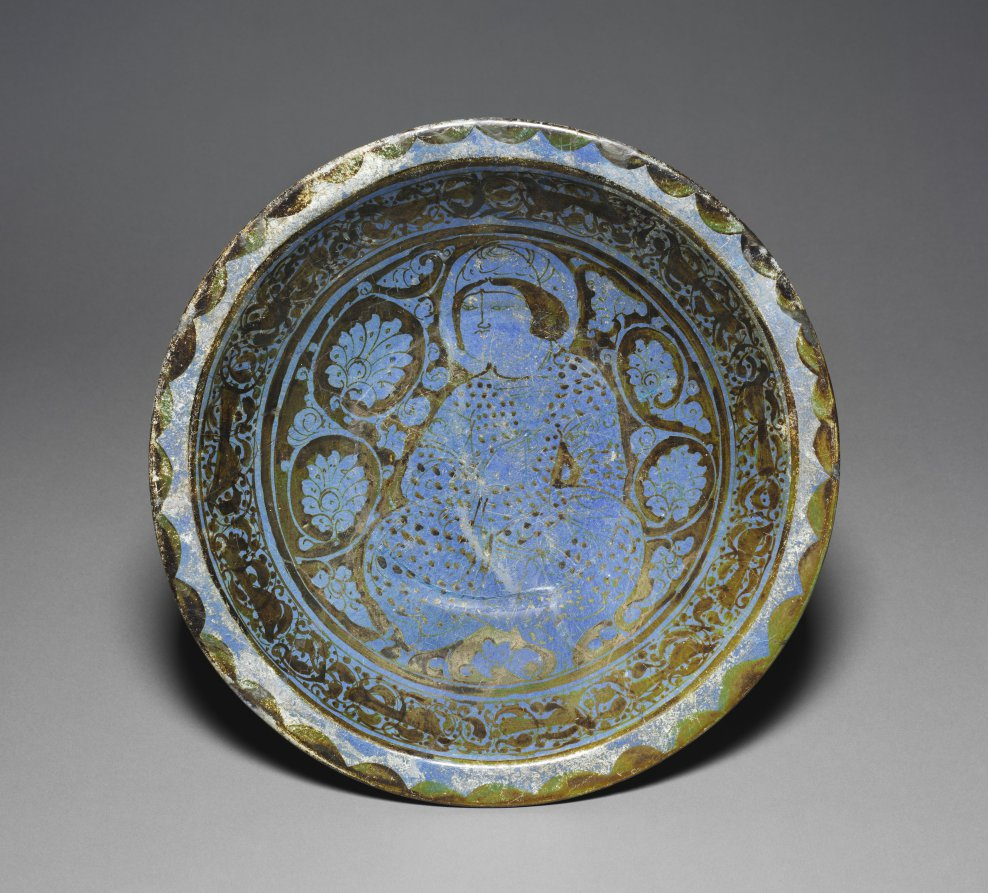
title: Luster Dish with Seated Prince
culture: Iran, Kashan, Seljuq period of Iran (1037–1194)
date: 1170–1220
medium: fritware with luster-painted design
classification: Ceramic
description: Along with Basra in Iraq and Fustat (Old Cairo) in Egypt, Kashan served as a hub of Islamic ceramic production in northern Iran. This dish was likely produced in one of its workshops and is admired for its rare blue glaze design on a luster ground. Rulers and other court officials are commonly depicted on lusterware of this period.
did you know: Around the dish's edge is a frieze of birds against an arabesque field.